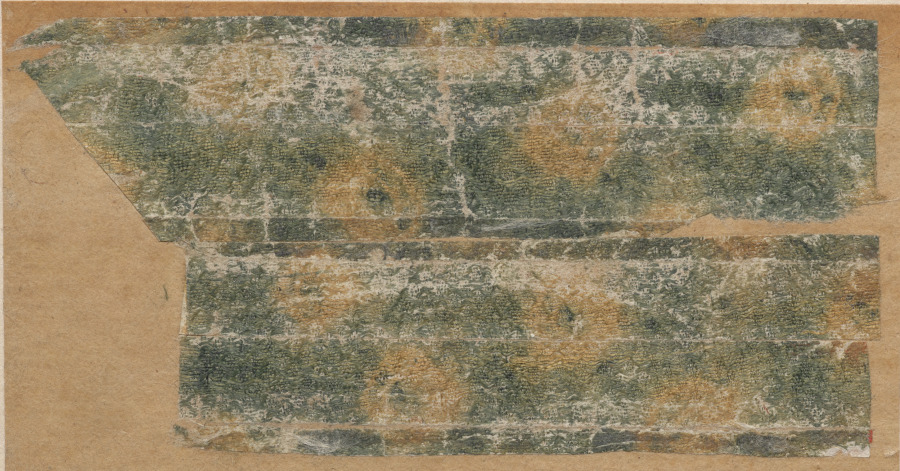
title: Fragment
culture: China, 8th century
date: 700s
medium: tabby ground and twill pattern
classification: Textile